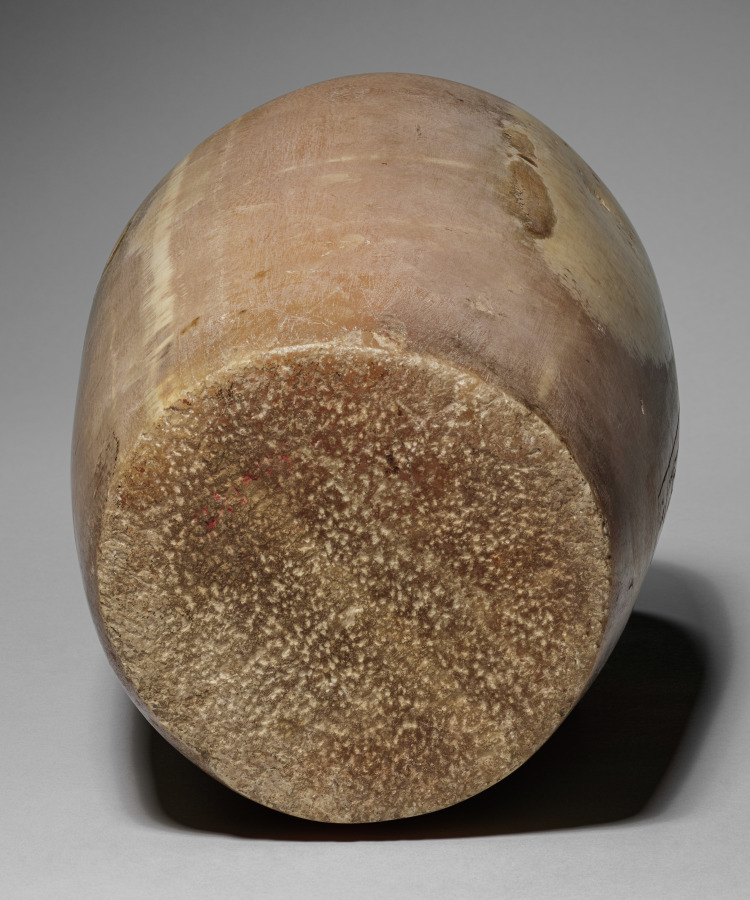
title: Canopic Jar with Falcon's Head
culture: Egypt, Late period (715–332 BCE), Dynasty 26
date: 664–525 BCE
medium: travertine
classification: Funerary Equipment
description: In the process of mummification, the liver, lungs, stomach, and intestines were removed, separately embalmed, and stored in specialized jars known as canopic jars (after a sailor in Greek mythology, who died at the town of Canopus in the Nile Delta and was worshipped there in the form of a human-headed jar). Each organ was identified with one of four funerary deities collectively known as the Sons of Horus: the liver with Imsety (man's head), the lungs with Hapy (baboon's head), the stomach with Duamutef (jackal's head), and the intestines with Qebehsenuef (falcon's head). It was their duty to protect the deceased and restore to him his body parts in the hereafter.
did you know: The falcon-headed deity Qebehsenuef protected the contents of this canopic jar. It contained the remains of the deceased's intestines, which were kept safe for the afterlife.